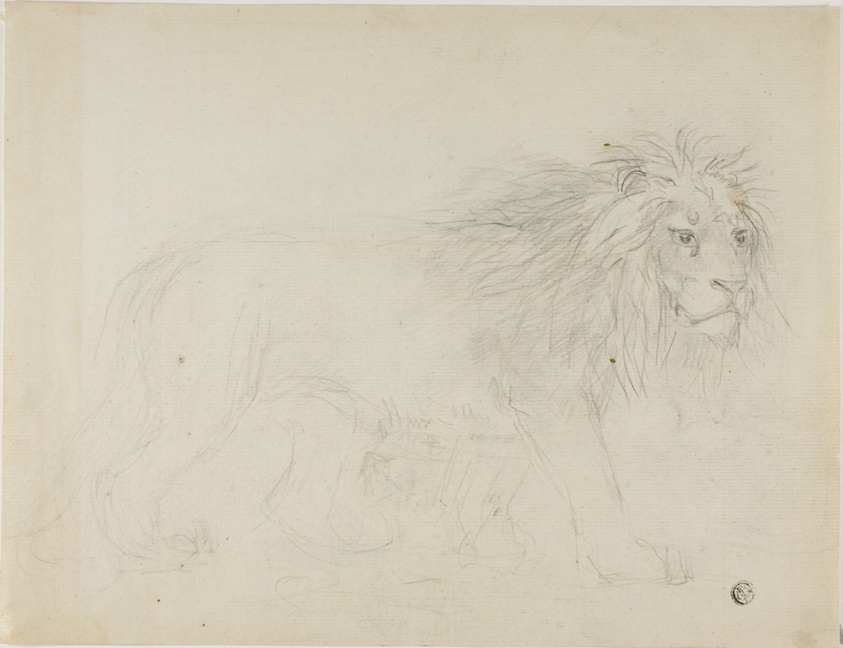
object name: Drawing and Watercolor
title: Lion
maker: Sawrey Gilpin (English, 1733-1807); or James Ward (English, 1769-1859); or Thomas Girtin (English, 1775-1802)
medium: Graphite on ivory laid paper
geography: England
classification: graphite; drawings (visual works); prints and drawing